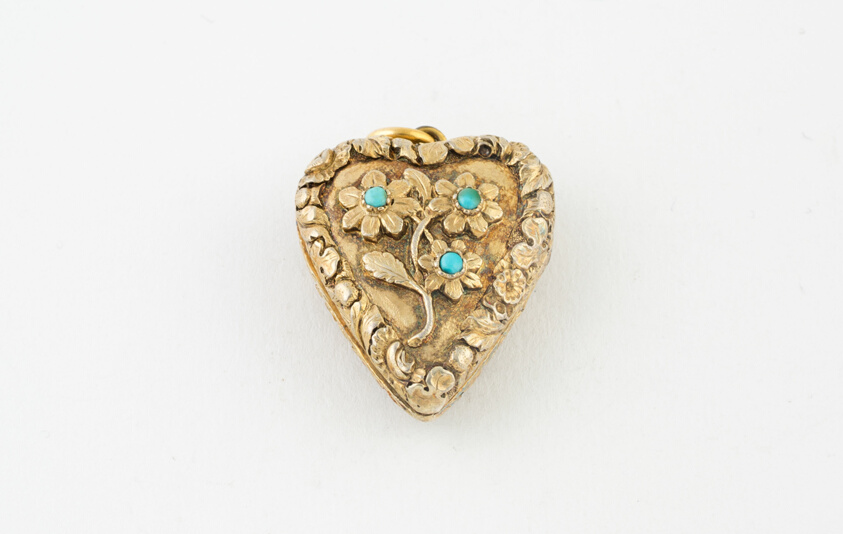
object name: Metalwork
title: Vinaigrette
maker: Thomas Newbold; Birmingham, England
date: c. 1821/22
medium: Silver gilt and turquiose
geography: Birmingham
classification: vinaigrette (container for health care); container for personal use; box; european decorative arts; metalwork; silver; decorative object/ornament